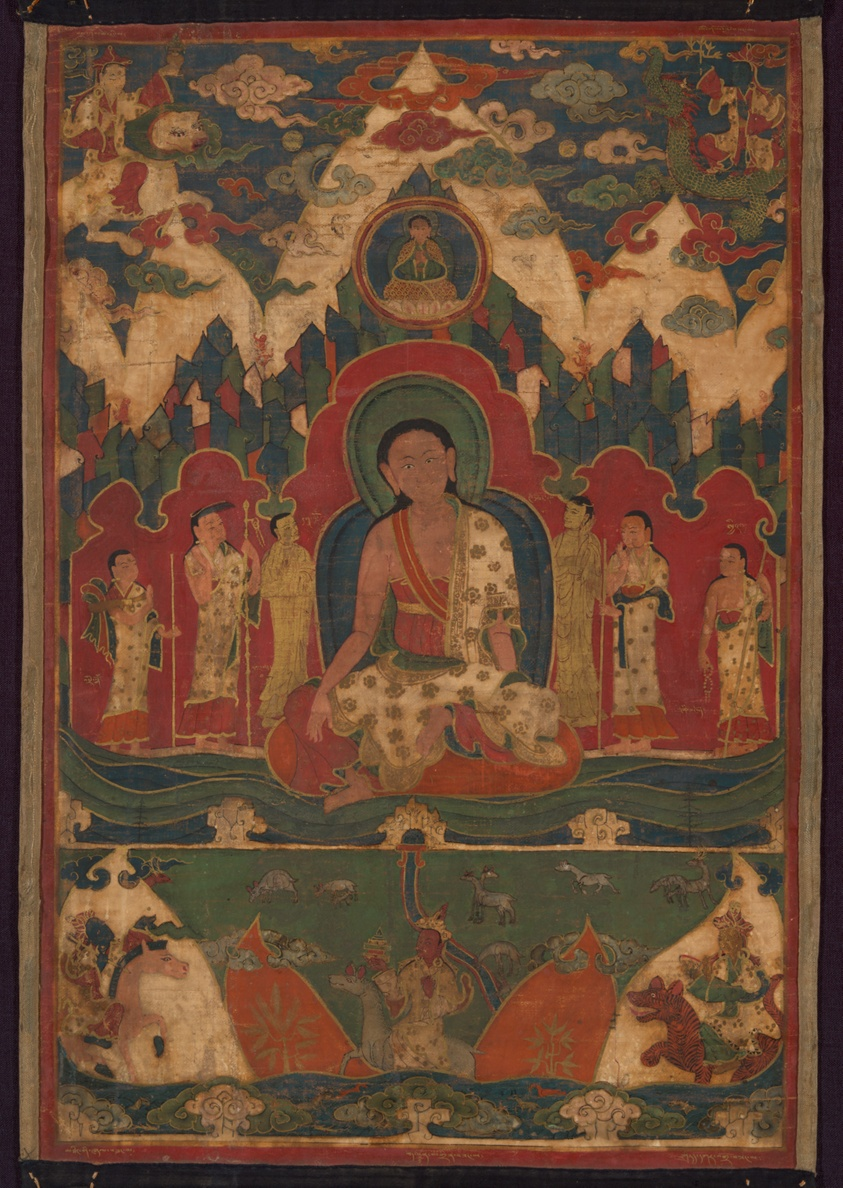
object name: Painting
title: Milarepa on Mount Kailash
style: Himalayan, tibetan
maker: Tibet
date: c. 1500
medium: Pigment and gold on cotton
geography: Tibet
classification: tankas (scrolls or banners); painting; asian art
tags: music, sisters, mountains, deities, clouds, animals, text, religious figures, dragons, horses, musicians